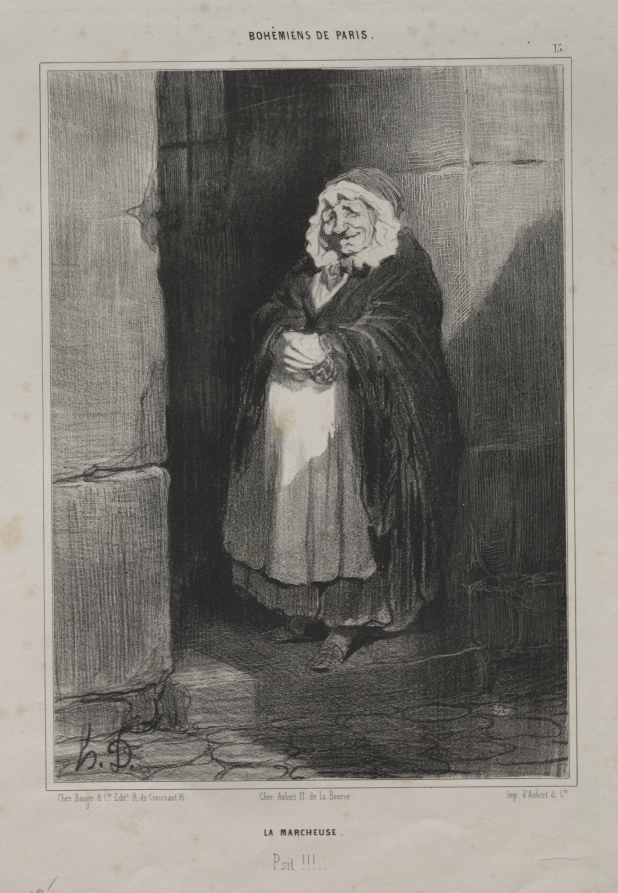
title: The Pedestrian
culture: France, 19th century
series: Bohemians of Paris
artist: Honoré Daumier (French, 1808–1879)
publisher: Aubert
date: 1841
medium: lithograph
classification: Print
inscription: Lower margin, printed: Chez Bauger & Cie. Edits R. du Croissant 16 / Chez Aubert Pl. de la Bourse / Imp. d'Aubert & Cie. ; in pencil: 2280/ip / 3etat 405 RR / 623B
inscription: Above image, printed: BOHÊMIENS DE PARIS. / 15. ; Below image, printed: LA MARCHEUSE. / Psit!!!..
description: This print was published as plate 15 from the series Bohemians of Paris. Some examples of the print, like this one, have the title The pedestrian (La Marcheuse), while others used the title The Nurse (La Garde-malade).